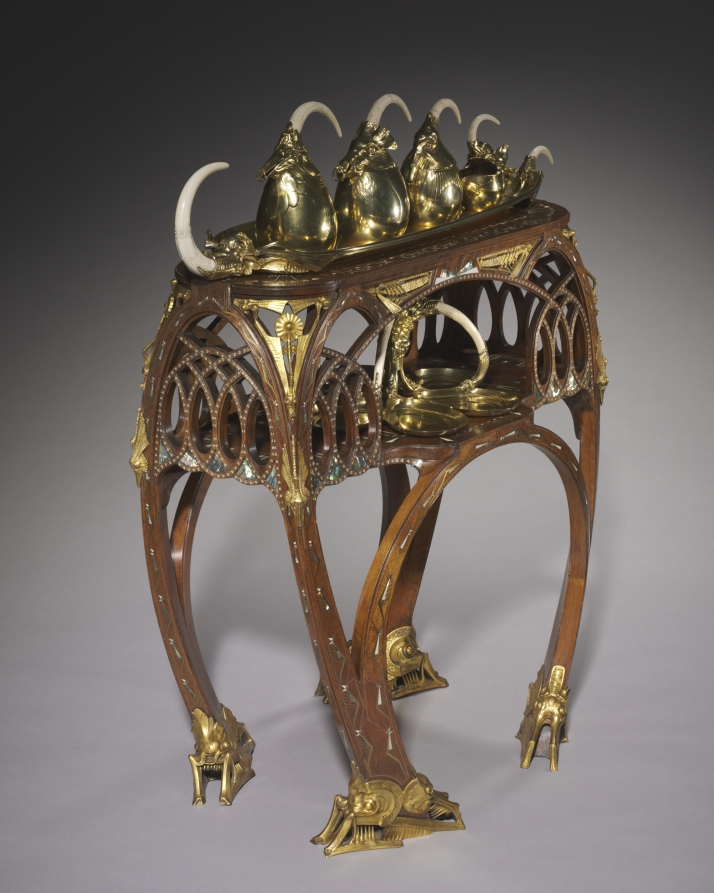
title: Salver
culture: France, Paris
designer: Carlo Bugatti (Italian, 1856–1940)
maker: Adrien-Aurélien Hebrard (French, 1866–1937)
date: c. 1907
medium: Gilt silver and ivory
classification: Silver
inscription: inscribed inside one of six ovoid compartments: "Bugatti" in ligature. Engraved on back: A.A. HEBRAND/ 8 RUE ROYAL/PARIS FRANCE.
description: This tea and coffee service, salver, and table, together with some now missing cups, were all designed by Carlo Bugatti as an ensemble and presented at the 1902 exposition devoted to decorative arts in Turin, Italy. The set was probably acquired from Bugatti's 1907 exhibition at the Galerie Hébrard in Paris by a wealthy South African widow, Anna Blake, who was living there at the time. Some of the animal and insect motifs suggest mythical beasts or the fossils of prehistoric animals. When Mrs. Blake returned to Cape Town, she took these and other pieces designed by Bugatti with her, and they remained in South Africa throughout her lifetime.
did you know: Carlo Bugatti's sons achieved illustrious careers of their own. Rembrandt Bugatti (1884-1916) became a celebrated sculptor, and Ettore Bugatti (1881-1947) manufactured luxurious automobiles and racing cars.